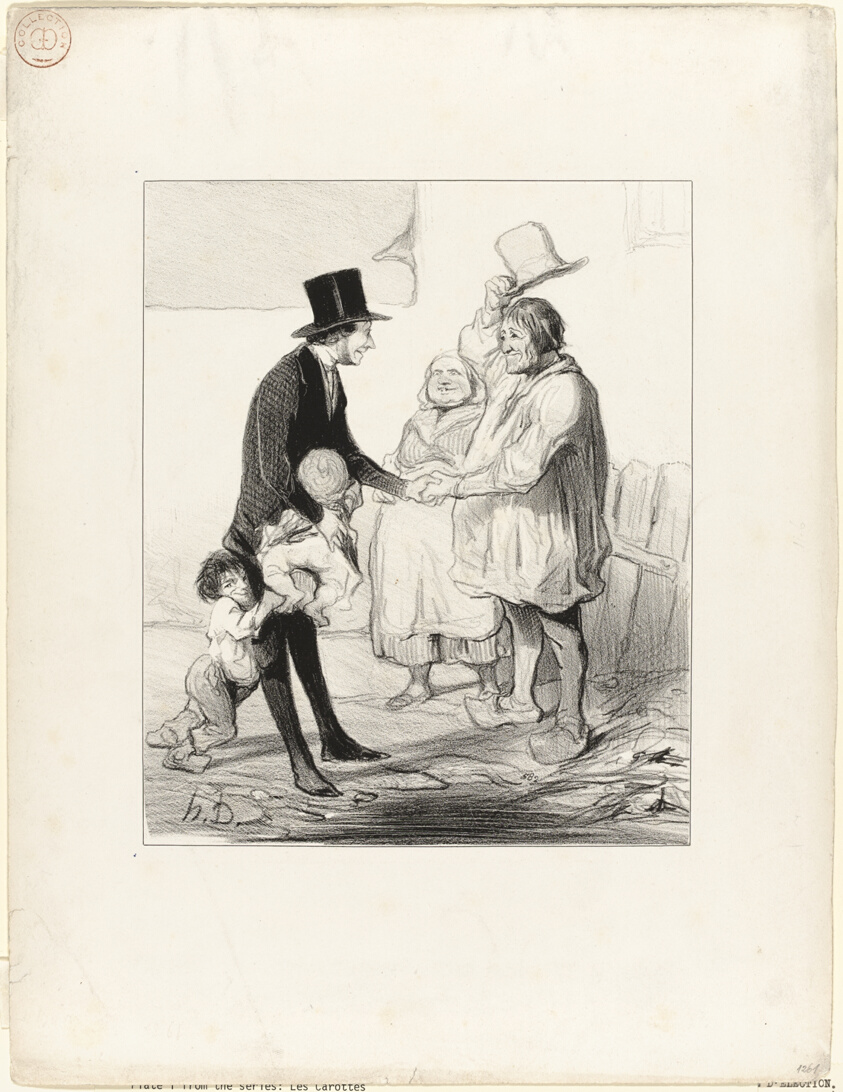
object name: Print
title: The Election Hoax. “My dear friend... do not think that I have come to ask you for your vote. I respect the independence of opinion too much for that. It is the Baroness who said to me: " Go see that poor Galouzet, tell his little wife that she is neglecting me and that I am angry with her for that. Ask about their lovely children, and say that I absolutely insist on having them over for dinner,” plate 1 from Les Carottes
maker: Honoré Victorin Daumier; French, 1808-1879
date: 1844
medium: Lithograph in black on off-white wove paper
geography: France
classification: lithograph; print; prints and drawing